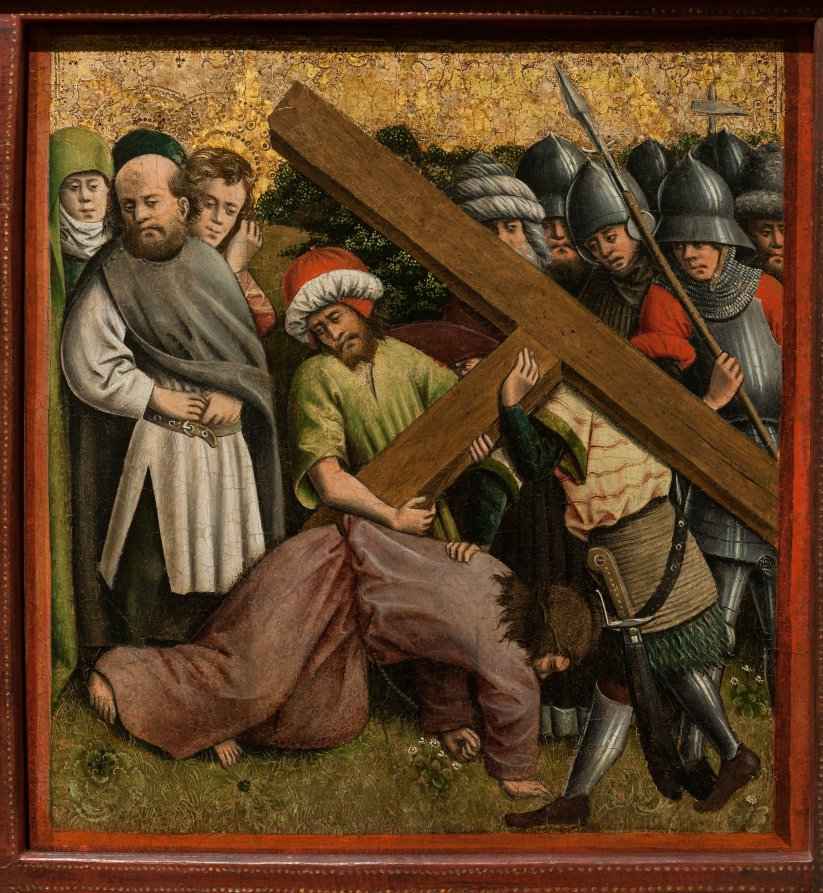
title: Altarpiece with The Passion of Christ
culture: Germany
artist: Master of the Schlägl Altarpiece (German)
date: c. 1440s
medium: oil and gold on wood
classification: Painting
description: The visual focus of this altarpiece is the suffering and death of Christ on the cross. So-called Passion cycles in art include the events leading up to and following the Crucifixion, not only as single subjects but as scenes meant to be read in sequence. Passion cycles were promoted by the two great teaching orders, the Franciscans and the Dominicans, for whom this subject represented the main religious drama of their churches, and also by the German mystics who advocated private contemplation on the humanity and suffering of Christ. The original context for this altarpiece remains unknown, but it was probably made for a religious institution in Westphalia in the Rhine Valley. During the 1870s it was given to the Abbey of Schlägl, near Linz in Upper Austria, from which both altarpiece and artist take their names. The altarpiece is not preserved today in its original format, and some of the individual scenes are missing. Scholars continue to debate the original number of scenes and their sequencing; nine of the original panels have survived, four are shown here.